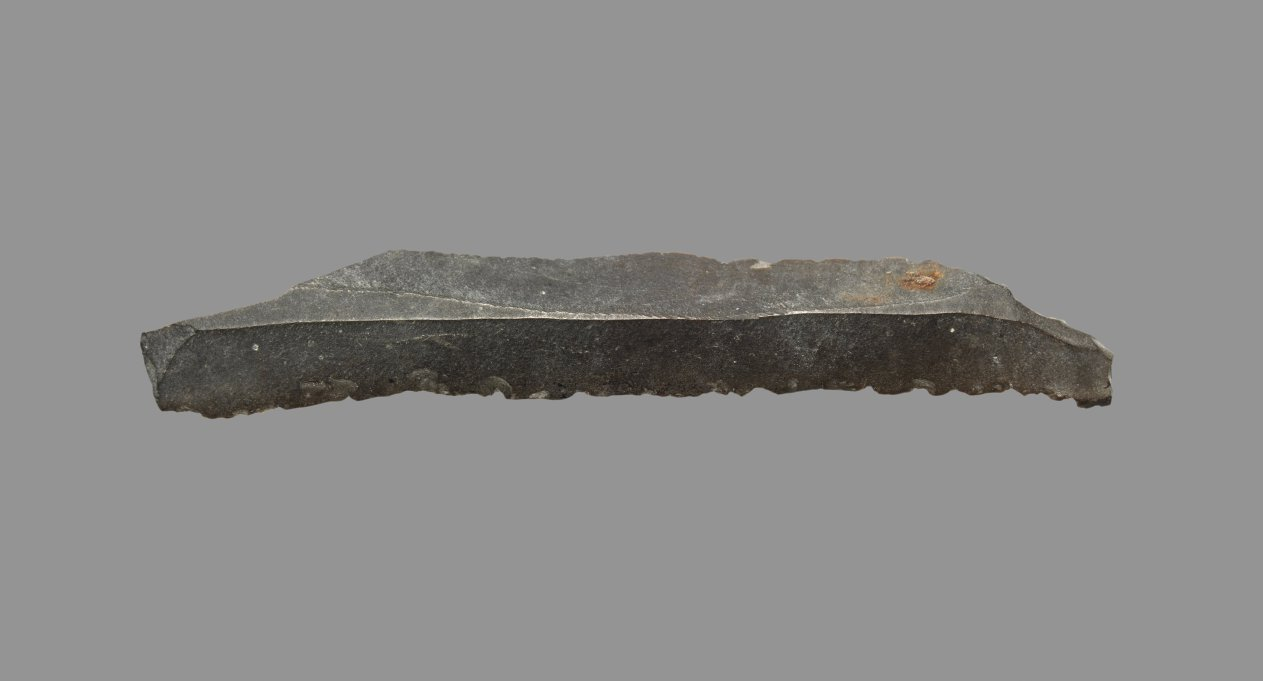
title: Sickle Blade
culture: Egypt, Middle Kingdom (2040–1648 BCE), Dynasty 12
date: 1980–1801 BCE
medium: flint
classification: Implements